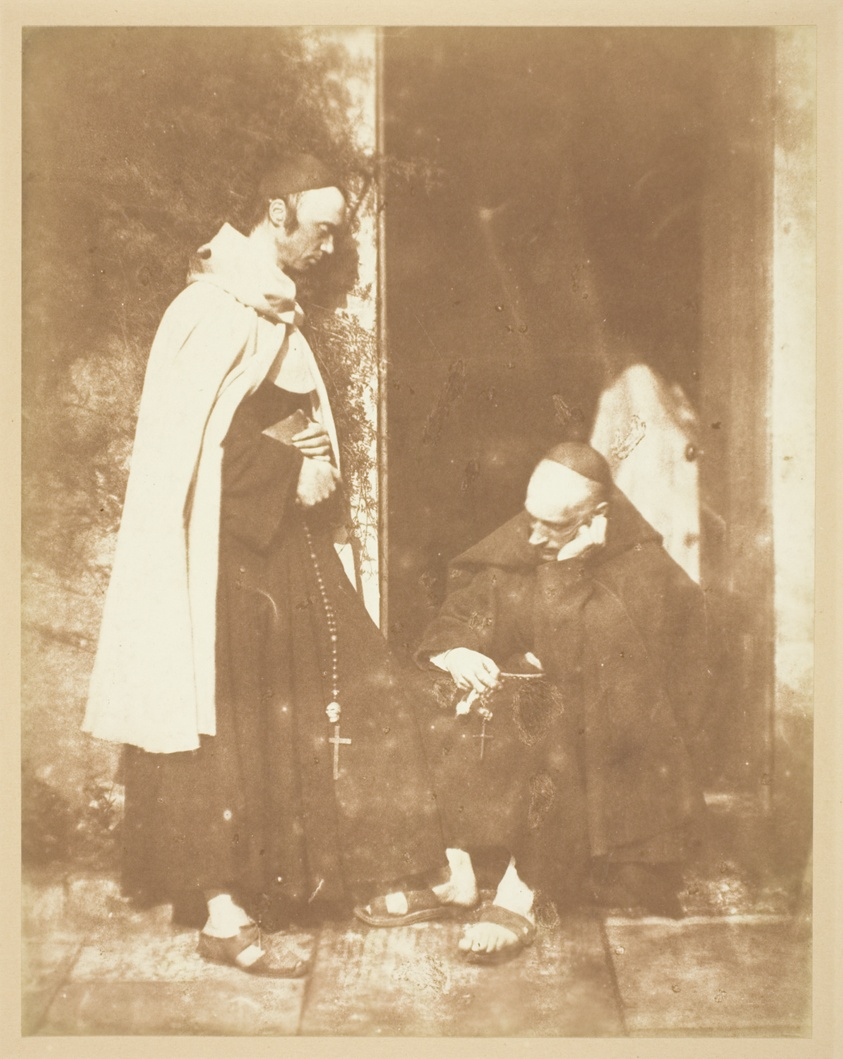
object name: Photograph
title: Two Friars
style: 19th century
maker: David Octavius Hill (Scottish, 1802–1870) and; Robert Adamson (Scottish, 1821–1848)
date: 1843/46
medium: Salted paper print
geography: Scotland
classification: salted paper print; photographic process; photography; photograph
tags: Collected by Hugh Edwards